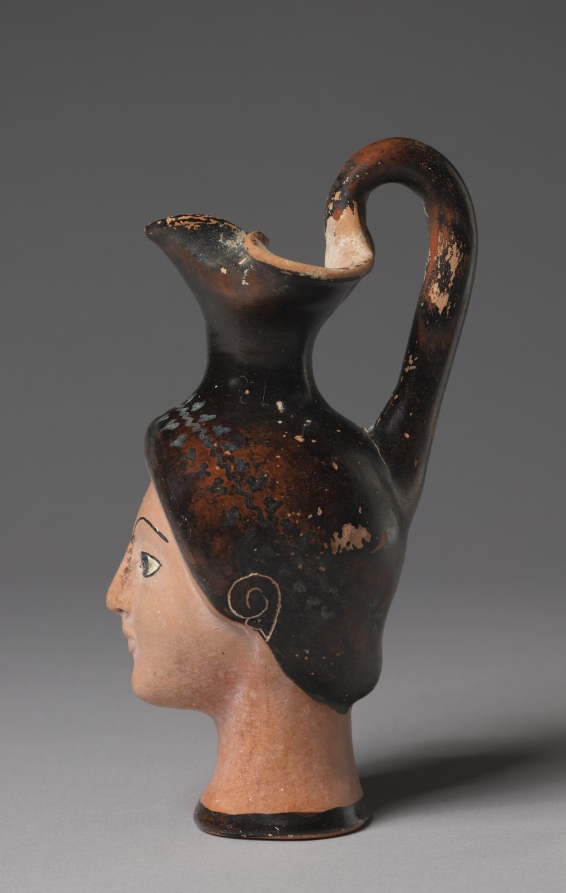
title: Oinochoe (Wine Jug) in the Form of a Woman's Head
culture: Greek, Attic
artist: associated with Class N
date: c. 475–450 BCE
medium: ceramic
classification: Ceramic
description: Mold-made vases in the form of human heads became popular in Athens in the fifth century BC. Although some represent male figures (including Herakles, Dionysos, and satyrs) and often take the form of drinking cups, wine jugs in the form of women’s heads are most common. Unusual on this example are the incised ears.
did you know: The artist used white paint for the eyes and an ivy wreath, now partly lost.